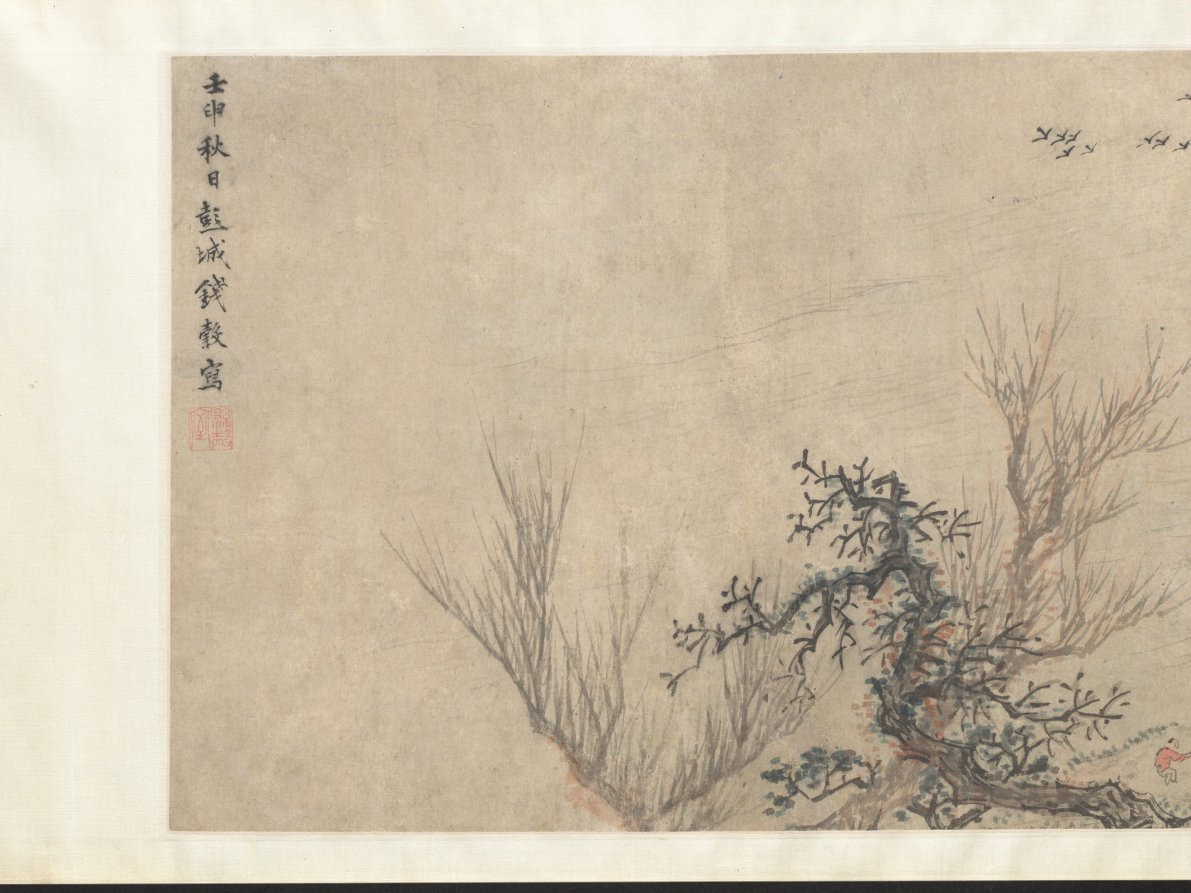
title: Fisherman's Joy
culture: China, Ming dynasty (1368–1644)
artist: Qian Gu (Chinese, 1508–c. 1578)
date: 1572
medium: Handscroll; ink and light color on paper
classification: Painting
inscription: Artist's inscription, signature, and seal: On the autumn day of the jen-shen year [1572], P'eng-ch'eng, Ch'ien Ku painted [this]. [seal] Hsüan-ch'ing shih. 2 colophons, both dated 1689, and 5 additional seals of Yün Shou-p'ing (1633-1690).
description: This painting has a scene showing two small crafts, each manned by two fishermen, practicing a traditional fishing method. In one of them, a man uses a bamboo pole to direct the movements of a cormorant bird sent into the water. Cormorant fishing, witnessed in some areas of the lower Yangzi River, appears in Zhe school paintings. Qian Gu may have borrowed these narrative figure scenes from Zhe school paintings, while his vantage point, brushwork, and soft tones align with the Wu school style. Scenes of fishermen appealed to urban and educated audiences who idealized the self-sufficient independence of fisherfolk.